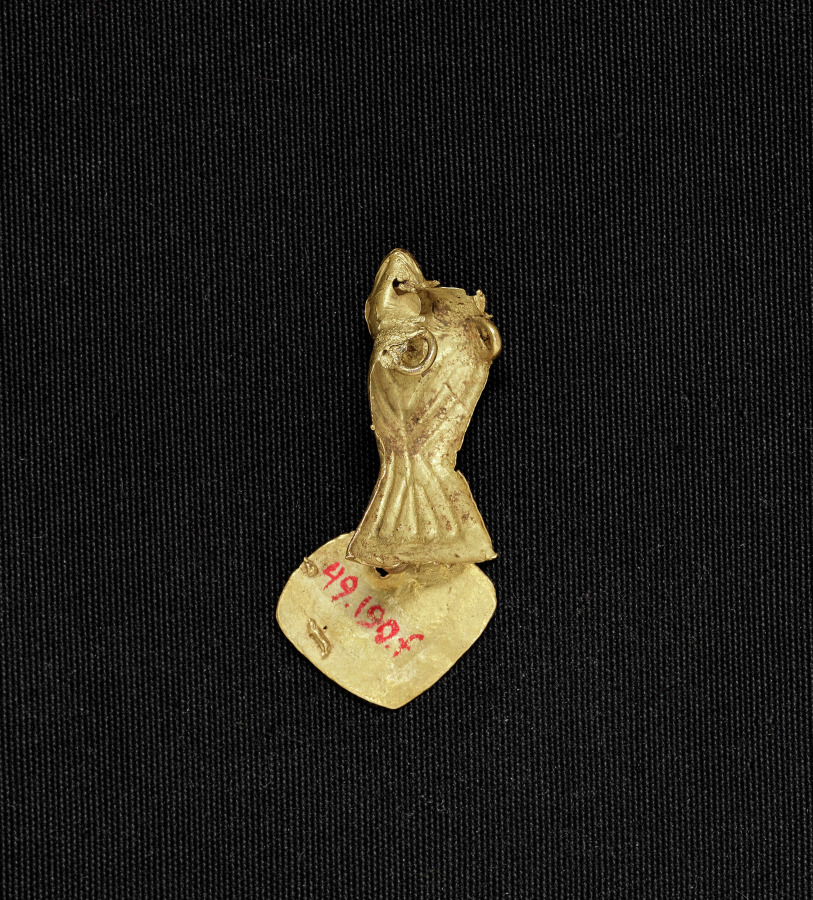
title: Bird Bead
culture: Colombia, Muisca style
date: c. 900–1550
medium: cast gold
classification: Jewelry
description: Muisca metalwork divides into two categories: ornaments to be worn, such as these, and offering figurines, in the case to the right. The elaborate bird pendant features delicate herringbone moldings, openwork patterns, and wing details-all part of the wax model from which the pendant was cast (see nearby computer animation). The dangles were attached after casting.